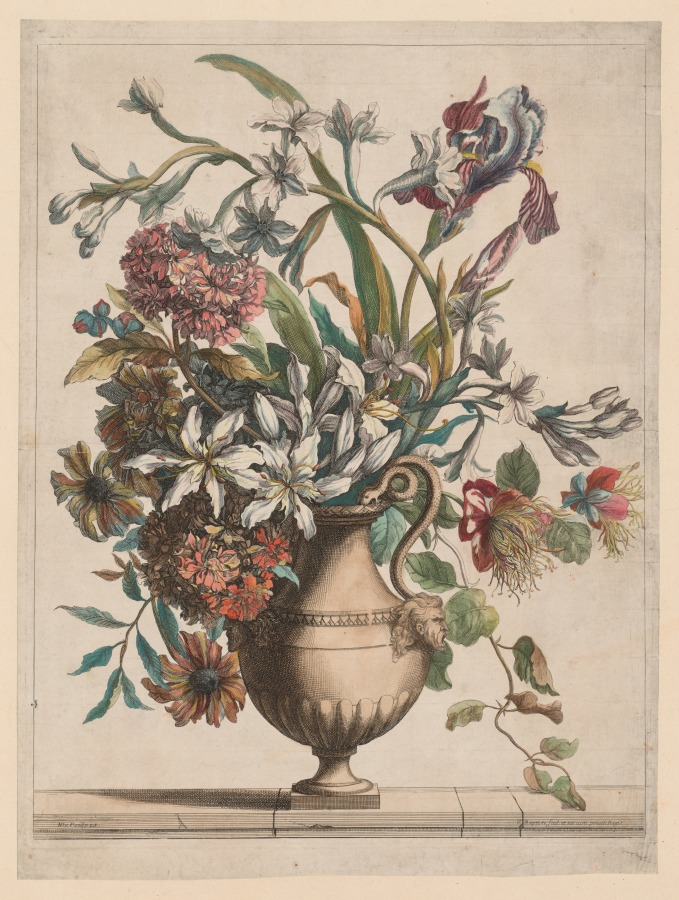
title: Liure de Toutes Sortes de fleurs d'après nature: Vase of Flowers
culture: France, 17th century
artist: Jean-Baptiste I Monnoyer (French, c. 1636–1699)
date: c. 1680–95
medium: etching and engraving, hand colored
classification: Print